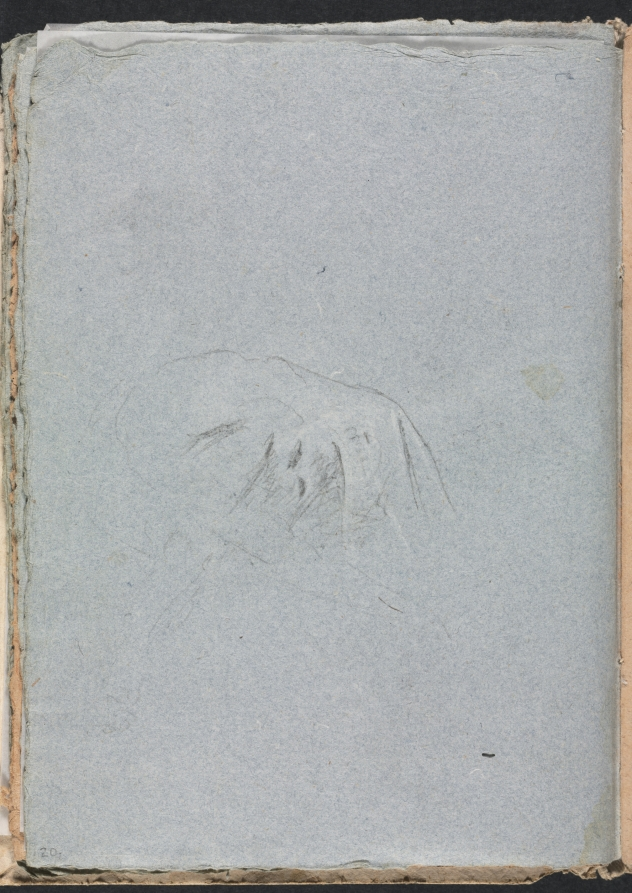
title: Verona Sketchbook: Drapery (page 20)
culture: Italy, 18th century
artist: Francesco Lorenzi (Italian, 1723–1787)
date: 1760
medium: black chalk with white heightening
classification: Bound Volume